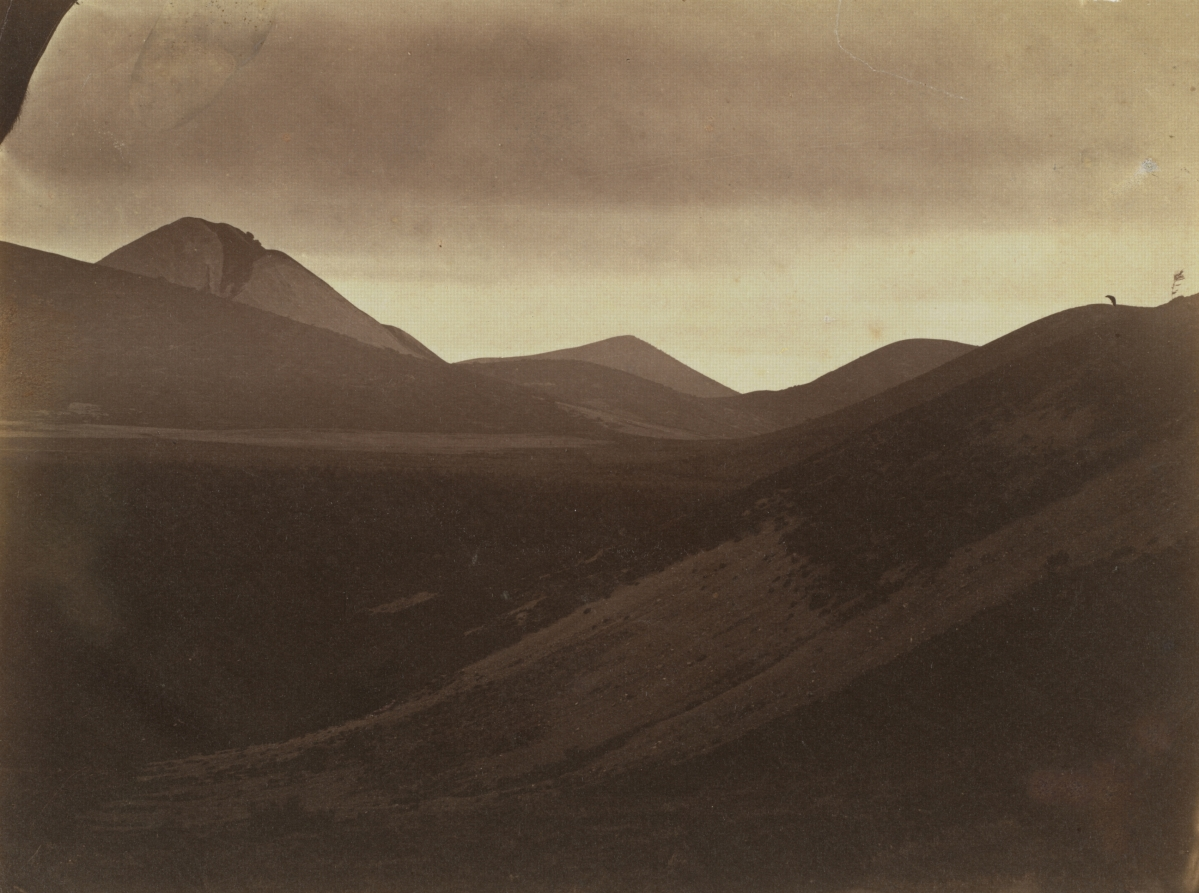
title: Dark Landscape with Hills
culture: France, 19th century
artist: Frank Chauvassaignes (French)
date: c. 1857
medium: albumen print from wet collodion negative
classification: Photograph